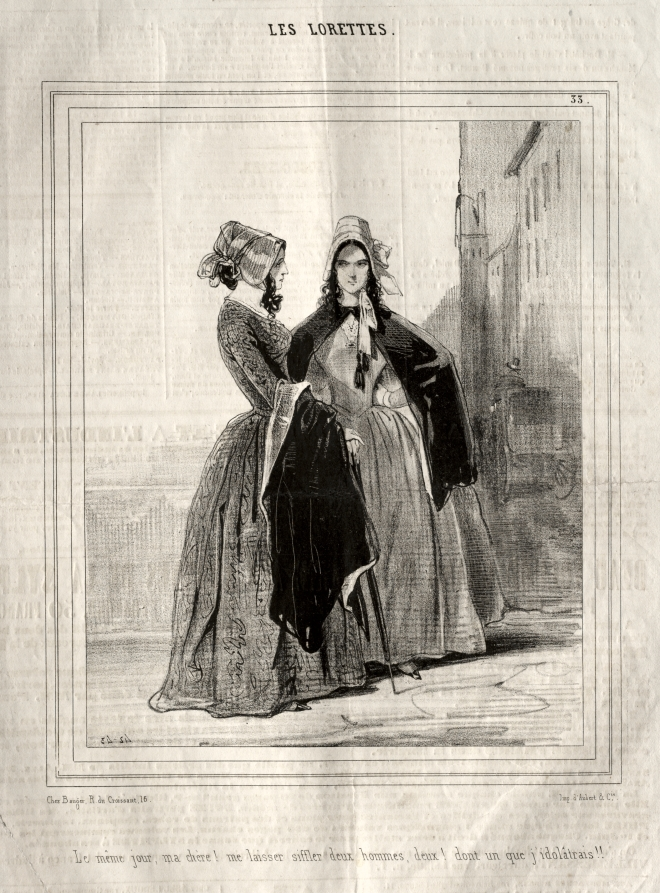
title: Les Lorettes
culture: France, 19th century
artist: Paul Gavarni (French, 1804–1866)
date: 1842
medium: lithograph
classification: Print